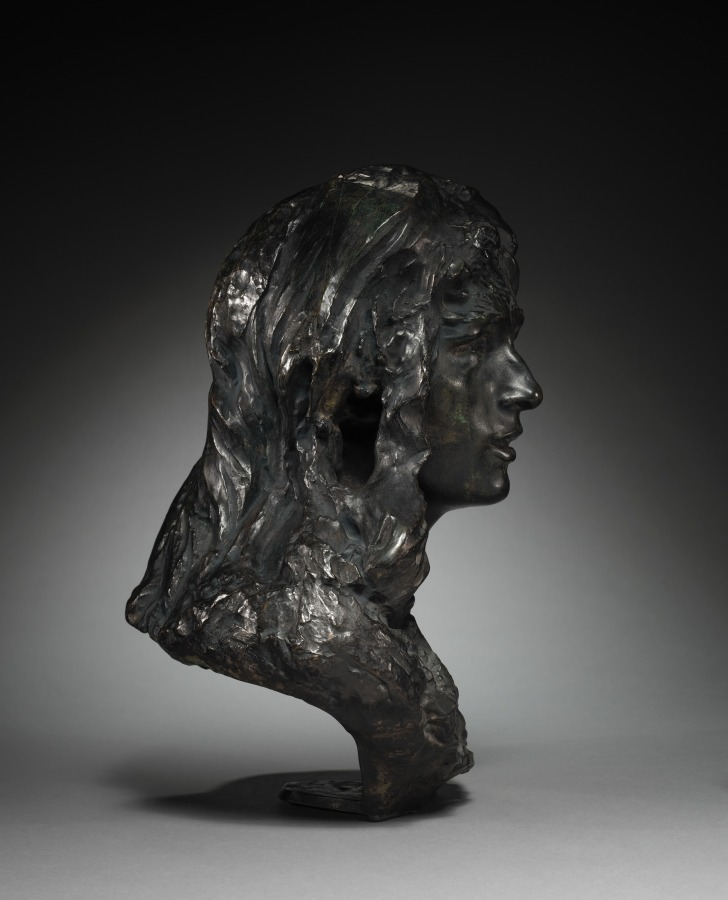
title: Mignon: Bust of Rose Beuret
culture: France, late 19th-early 20th century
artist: Auguste Rodin (French, 1840–1917)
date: c. 1867–1868 (original model)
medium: bronze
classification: Sculpture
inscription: Signed on shoulder to right: "A. Rodin"